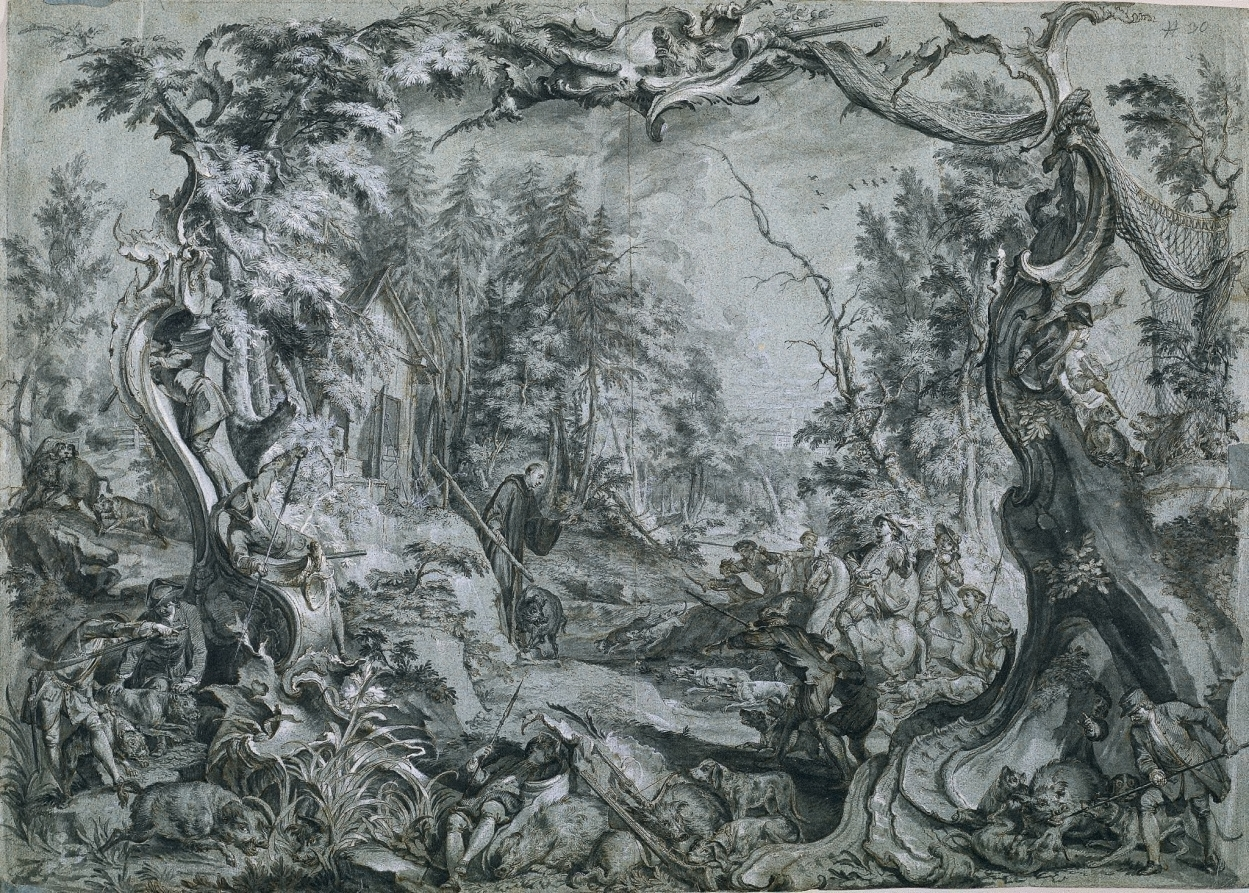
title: Saint Deicolus and the Boar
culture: Germany, 18th century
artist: Johann Wolfgang Baumgartner (German, 1712–1761)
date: 1747–48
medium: pen and brown and gray inks and brush and gray wash heightened with white gouache; incised, verso coated with red chalk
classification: Drawing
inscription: Upper right, in graphite: a 30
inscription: verso, upper left, in graphite: 70_-50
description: German artist Johann Wolfgang Baumgartner's innovations in rococo design are magnificently demonstrated in this sheet showing the story of Saint Deicolus and the Boar. The format of the work imitates that of a decorative cartouche, an ornamental framework surrounding an open field usually reserved for an inscription or emblem. Baumgartner ingeniously adapted the cartouche form for this scene: the framing elements seem to grow out of the landscape but are clearly artificial, and have the appearance of exuberant metalwork intertwined with vegetation and rocks. Deicolus was an Irish saint who founded an abbey in the Burgundy region of France. Baumgartner shows an incident in which Deicolus saved a boar from the hunting party of the ruler Clotaire II. The highly finished drawing on blue paper was made as a design for print from a suite combining saints with depictions of the hunt.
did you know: The rarely depicted St. Deicolus was an Irish monk who lived in the 600s and was known for his retreat to a hermitage in a forest.